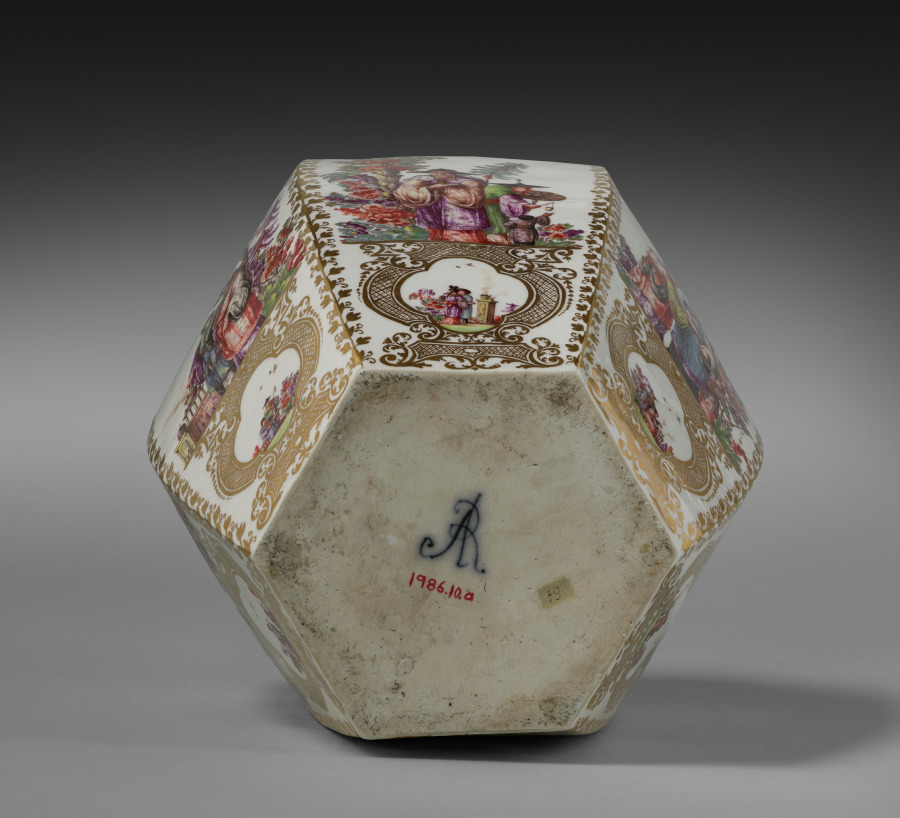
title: Vase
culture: Germany, Meissen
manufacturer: Meissen Porcelain Factory (German, est. c. 1710)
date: c. 1728–30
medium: porcelain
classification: Ceramic